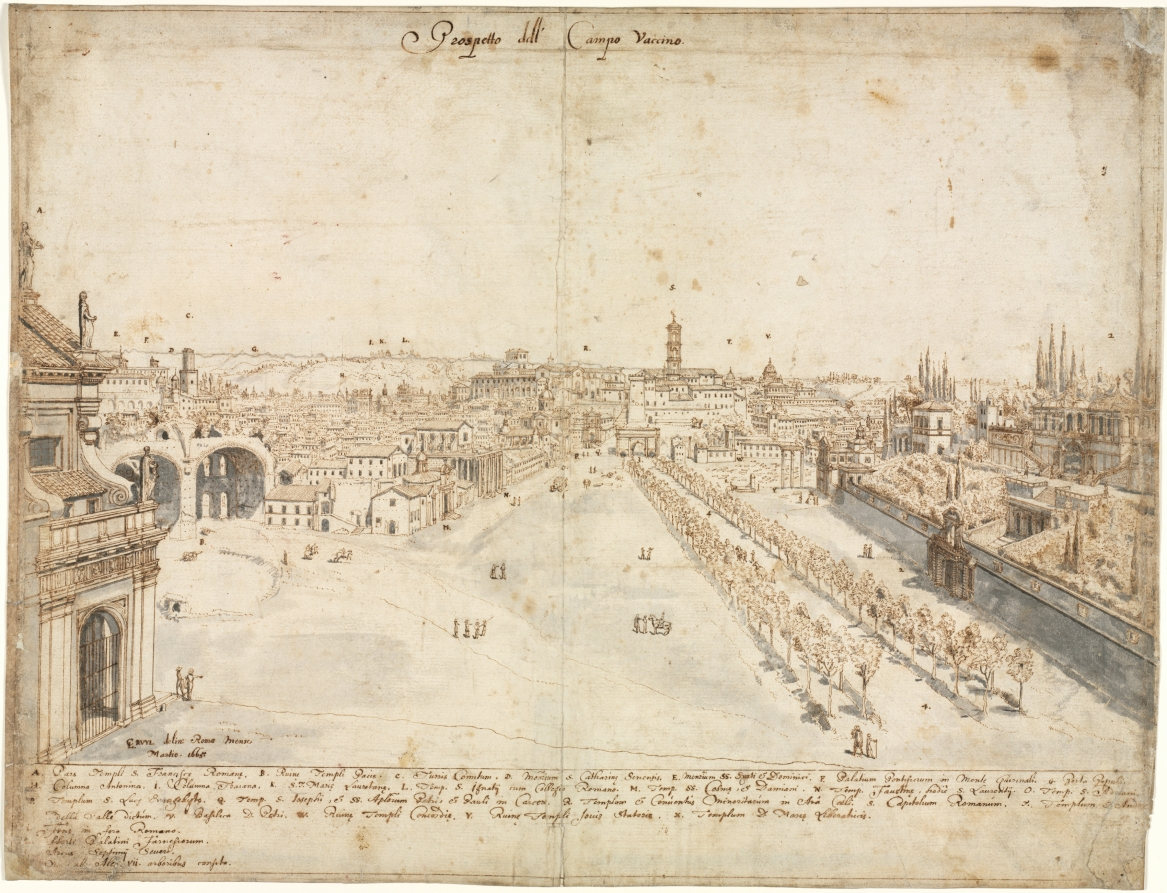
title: Eighteen Views of Rome: The Campo Vaccino (The Roman Forum)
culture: Flanders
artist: Lievin Cruyl (Flemish, c. 1640-c. 1720)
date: 1665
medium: pen and brown ink and brush and gray wash over stylus and graphite; framing lines in brown ink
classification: Drawing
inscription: signed, lower right, in brown ink: [artist's monogram: LC] RVYL delin: Romæ mense / Martio. 1665. ; by artist, upper center, in brown ink: Prospetto dell' Campo Vaccino. ; by artist, throughout composition, in brown ink: [the letters A-Y and the numerals 1-4] ; by artist, across bottom, in brown ink: A. Pars Templi S. Francescæ Romanæ. B. Ruinæ Templi Pacis. C. Turris Comitum. D. Montorium S. Catharinæ Senensis. E. Monrium SS. Syxti et Dominici. F. Palatium Pontificium in Monte Quirinale. G. Porta Populi. / H. Columna Antonina. I. Columna Traiana. K. S.T. Mariæ Laurentanæ. L. Temp. S. Ignatij cum Collegio Romano. M. Temp. SS. Cosmæ, et Damiani. N. Temp. Fautinæ, hodiè S. Laurentij. O. Temp. Adreani. / P. Templum S. Lucæ Evangelistæ. Q. Temp. S. Iosephi, et SS. Aplorum Petri, et Pauli in Carcere. R.Templum et Conventus Minoritarum in Arâ Coeli. S. Capitolium Romanum. T. Templum S. Andr[ea] / della Valle dictum. U. Basilica S. Petri. W. Ruinæ Templi Concordiæ. V. Ruinæ Templi Jovis Statoris. X. Templum D. Mariæ Liberatoris. / [1]. Fons in Foro Romano. / 2. Horti in Palatini Farnesiorum. / 3. Arcus Septimij Severi. / [4.] V[ia] ab Alex. vii. arboribus consita. ; ON STRIPS OF PAPER MOUNTED TO VERSO, lower center, in graphite: A20967 ; lower right, in graphite: E. 17 ; ON PIECE OF PAPER APPLIED TO VERSO AS A REPAIR, center, in graphite: [two lines of illegible inscription] [masked]